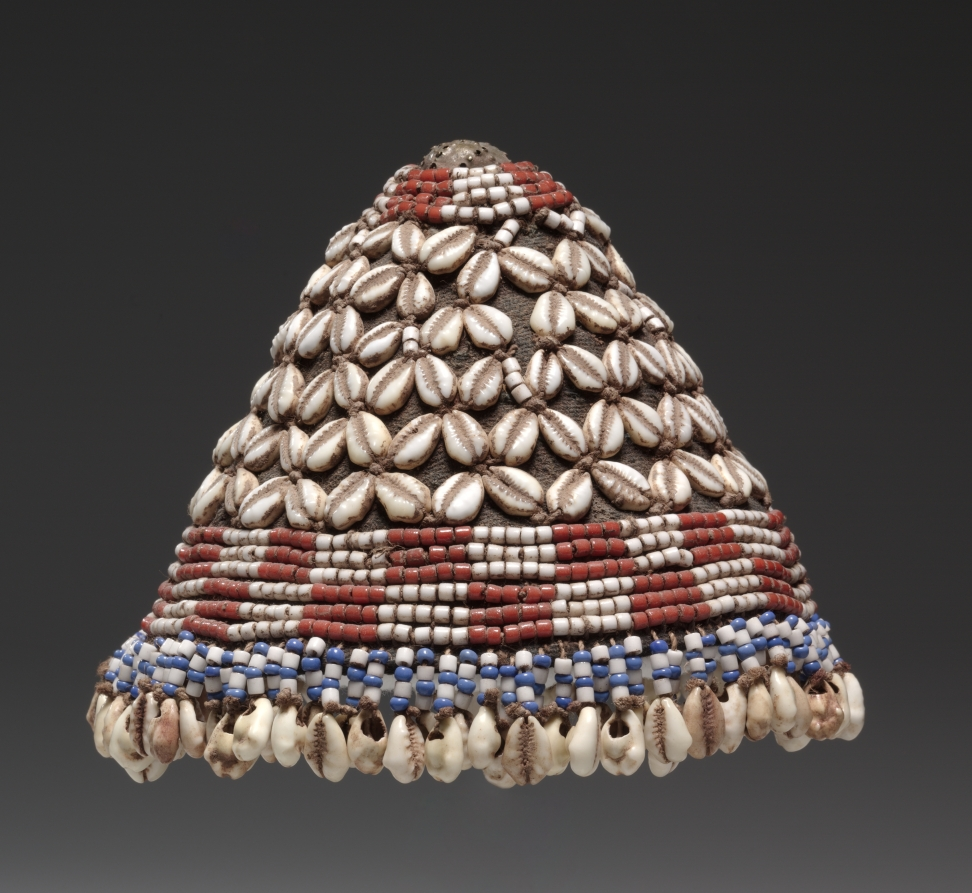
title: Cap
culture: Africa, Central Africa, Democratic Republic of the Congo, Kuba-style maker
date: early 1900s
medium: Plant fibers, cloth, glass beads, cowrie shells, and copper alloy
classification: Garment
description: Costumes worn by the Kuba king, members of his family, and the nobility are spectacular. Raffia cloth, leopard skin, feathers, beads, and cowrie shells are combined in magnificent ensembles used for specific ceremonial roles. Beaded caps of this sort are worn only by members of the royal family. When not in use, they are preserved in royal storehouses.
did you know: The beads and shells on this cap were imported from outside of central Africa.